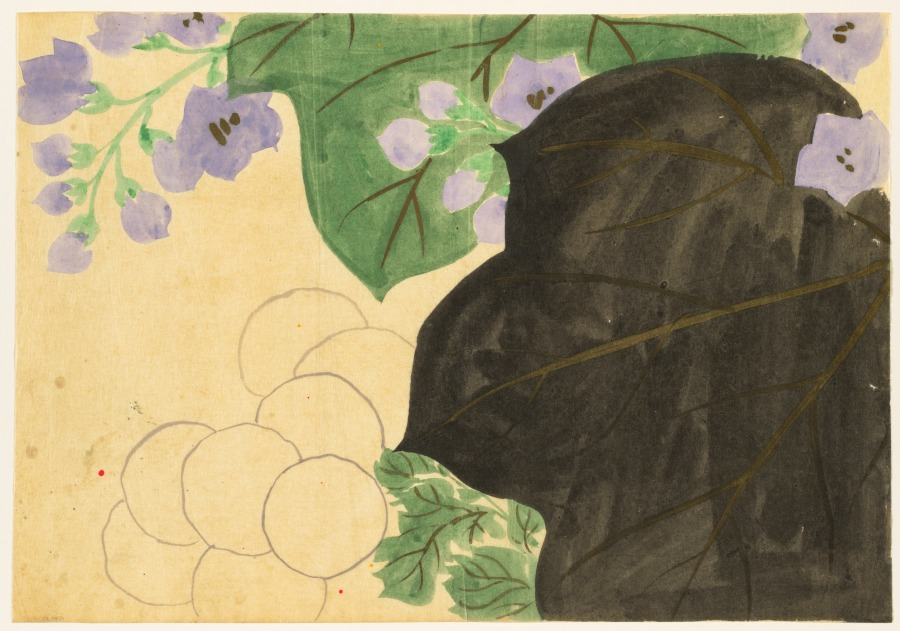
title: Flowers of a Hundred Worlds (Momoyogusa): Chrysanthemum and Paulownia (Kikukiri)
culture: Japan, Meiji period (1868–1912)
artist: Kamisaka Sekka (Japanese, 1866–1942)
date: 1909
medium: ink and color on paper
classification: Drawing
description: Kamisaka Sekka made preparatory drawings for his Flowers of a Hundred Worlds series on tracing paper with ink and color. The freehand sketches are much looser than the finished, printed compositions.